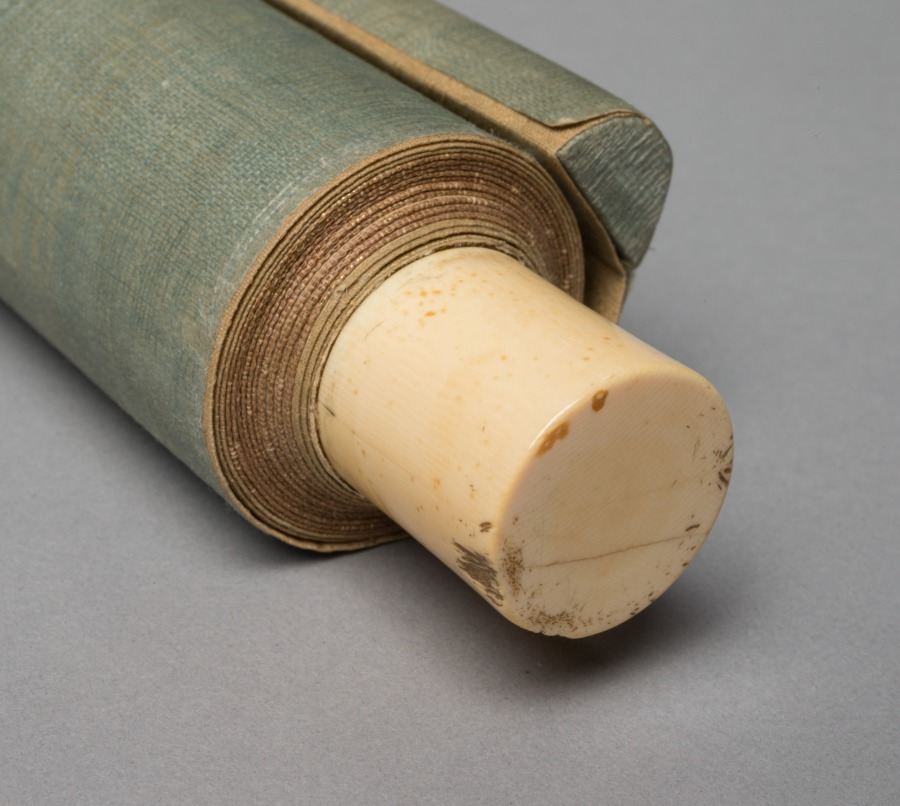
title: Monkey Hanging on to a Branch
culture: Japan, Edo period (1615–1868)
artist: Mori Sosen (Japanese, 1747–1821)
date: 1780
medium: hanging scroll; color on paper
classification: Painting